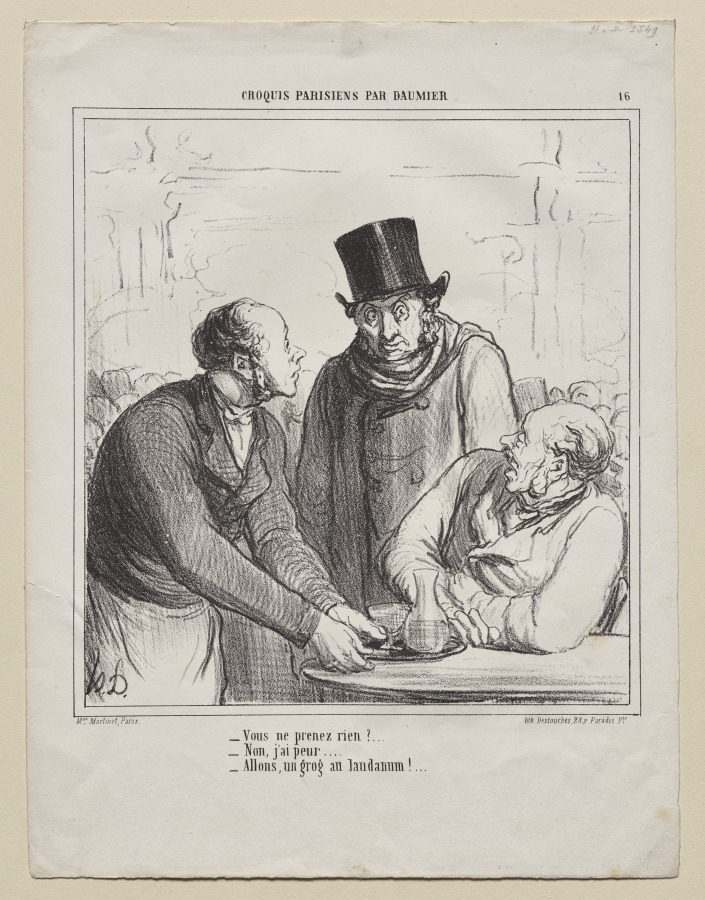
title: Are you not ordering anything?...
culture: France, 19th century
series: Parisian Sketches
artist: Honoré Daumier (French, 1808–1879)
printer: Destouches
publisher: Mon. Martinet, r. Rivoli, et 41 r. Vivienne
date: 1865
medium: lithograph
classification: Print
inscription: Upper margin, pencil: H&D 1549 ; Lower margin, printed: Mon. Martinet, Paris / lith. Destouches, 28, r. Paradis Pre.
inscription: Above image, printed: CROQUIS PARISIENS PAR DAUMIER. / 16 ; Below image, printed: - Vous ne prenez rien ?... / - Non, j'ai peur.... / - Allons, un grog au laudanum !...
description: This print was published in Le Charivari (November 2-3, 1865) as plate 16 from the series Parisian Sketches.